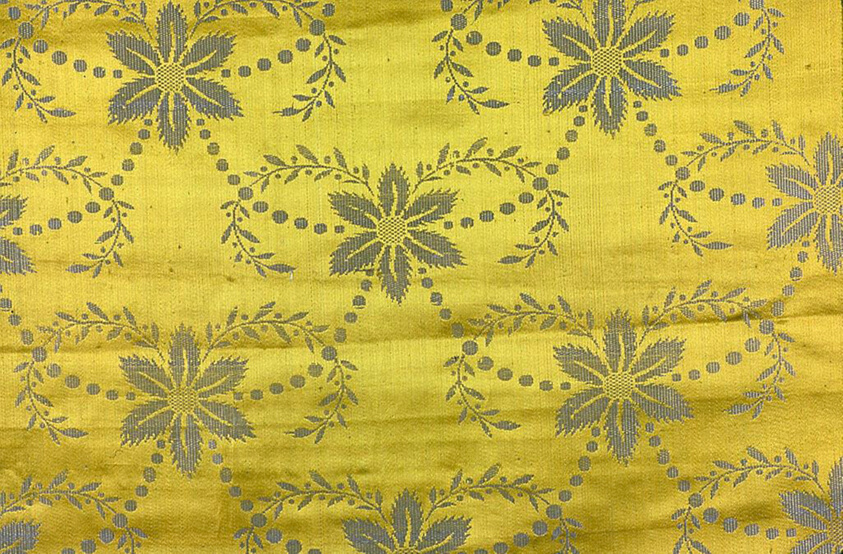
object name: Textile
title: Panel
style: empire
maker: France, Lyon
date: Empire period, c. 1810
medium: Silk, warp-float faced 7:1 satin weave with plain interlacings of secondary binding warps and self-patterning ground wefts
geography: Lyon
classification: textile; weaving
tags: flowers